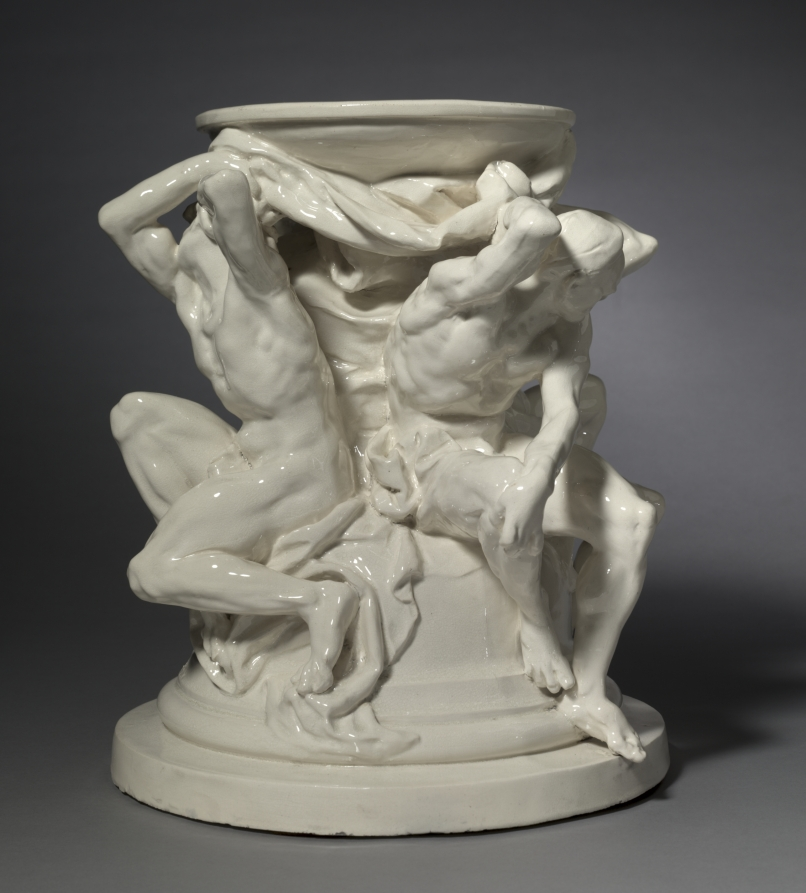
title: Titans, Support for a Vase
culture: France, made at Choisy le Roi, 19th century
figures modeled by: Auguste Rodin (French, 1840–1917)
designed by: probably by Albert-Ernest Carrier-Belleuse (French, 1824–1887)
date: c. 1877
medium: glazed earthenware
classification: Ceramic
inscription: incised near bottom of plinth: "A. CARRIERE-BELLEUSE."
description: During his lifetime and afterward, Auguste Rodin was viewed as the modern equivalent to Michelangelo. Rodin worked against the prevailing styles of his time and may have seen parallels between his own struggles and Michelangelo’s reputation in the 1800s as a suffering genius. In 1875 Rodin went to Italy to study Renaissance art, specifically works by Michelangelo. The twisting titans (giants) on this pedestal base are directly inspired by Michelangelo’s ignudi (male nudes) on the Sistine Chapel ceiling. Rodin did not directly copy the poses but translated the energy and movement of the nudes into new, three-dimensional forms.